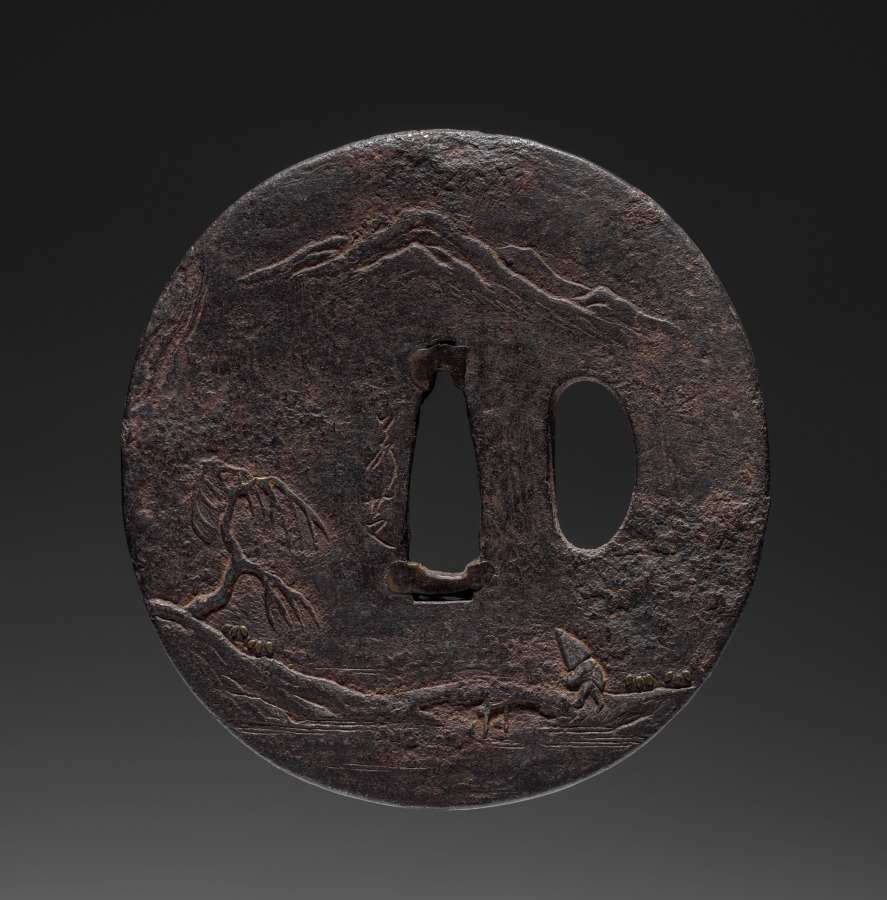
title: Sword Guard (Tsuba) with Chinese Landscape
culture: Japan, Edo period (1615–1868)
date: late 1600s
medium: iron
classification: Arms and Armor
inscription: signed "Jakushi."